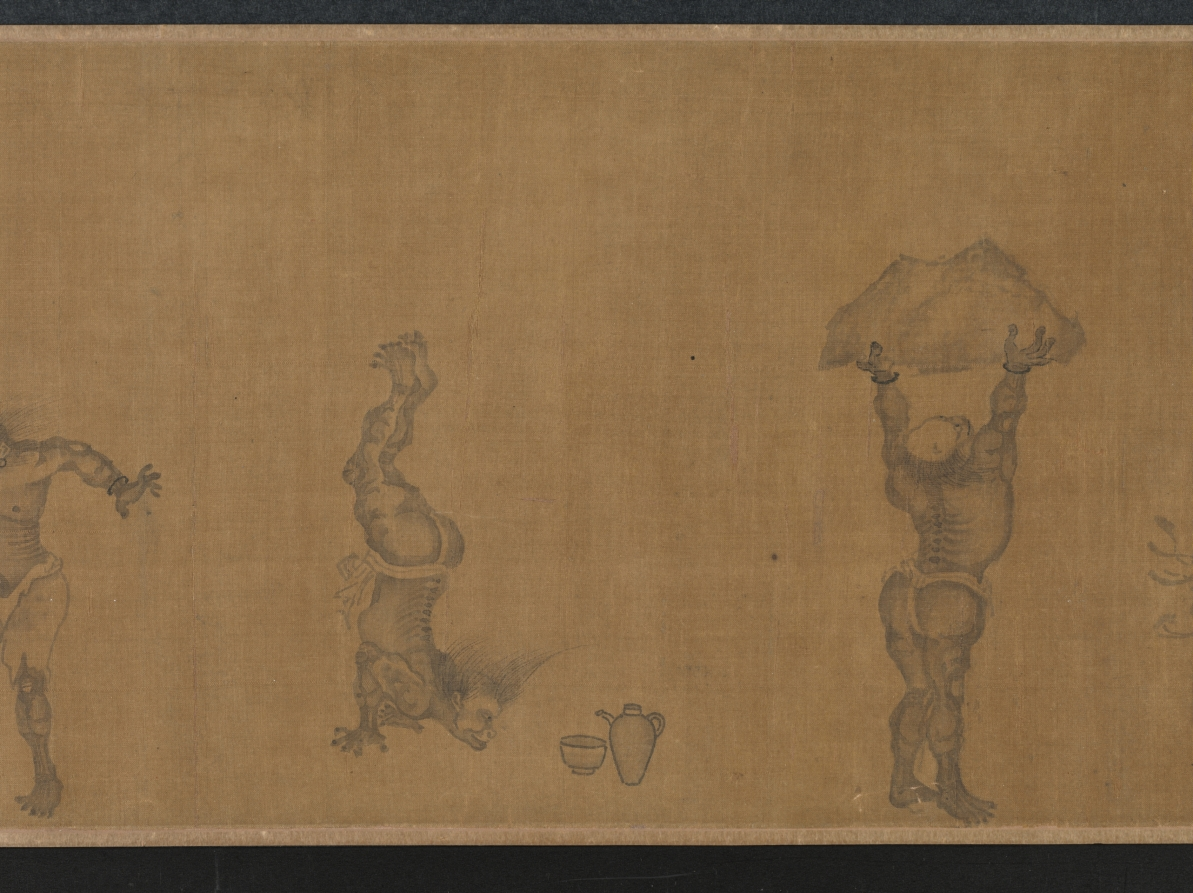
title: The Lantern Night Excursion of Zhong Kui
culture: China, Yuan dynasty (1271-1368)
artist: Yan Hui (Chinese, active 1270–1310)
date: late 1200s–early 1300s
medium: handscroll; ink and slight color on silk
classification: Painting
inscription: Artist's signature [and probable seal]: Yan Qiuyue 顏秋月 Title on frontispiece and 1 seal of Niu Shuyu 鈕樹玉 (1760–1827): Qiuyue mohuan 秋月墨幻 [Qiuyue's Ink Fantasy]. 31 additional seals: 2 of Yang Shiqi 楊士奇 (1365–1444); 2 of An Guo 安國 (1481–1534); 8 of Xiang Yuanbian 項元汴 (1525–1590); 2 of Geng Zhaozhong 耿昭忠 (1640–1686); 4 of Pu Tung 溥侗 (1870–1952); 7 of Tan Jing 譚敬 (1911–1991); 1 of Liu Ting-chih (20th c.); 5 unidentified.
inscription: An inscription by Zizhi Shanren 紫芝山人 [probably Jiang Hui 蔣惠], dated 1389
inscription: An inscription by Wu Kuan 吳寬 (1436–1504)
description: Here, the demon queller Zhong Kui leads a nightly procession of street entertainers with bare, muscular bodies and demonic faces. Some wear shabby clothes, and all perform stunts and tricks to astound and scare the viewer. In fact, a New Year custom in cities of southeast China had the poor, disguised as demons, process through the streets and play their tricks to clear households of evil spirits and welcome the spring. From right to left, a demonic figure leads the procession and beats a drum; another lifts a large rock; one stands on his hands trying to drink; one balances a jar on his elbow; three hold and wield weapons; one carries a folded chair covered by a cow’s skin; another holds Zhong Kui’s qin (zither), books, brush, and inkstone. At the end of the scroll, two figures offer a cup and bottle of wine to Zhong Kui, who lifts his hand in command.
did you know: Zhong Kui was an ancient ghostbuster.